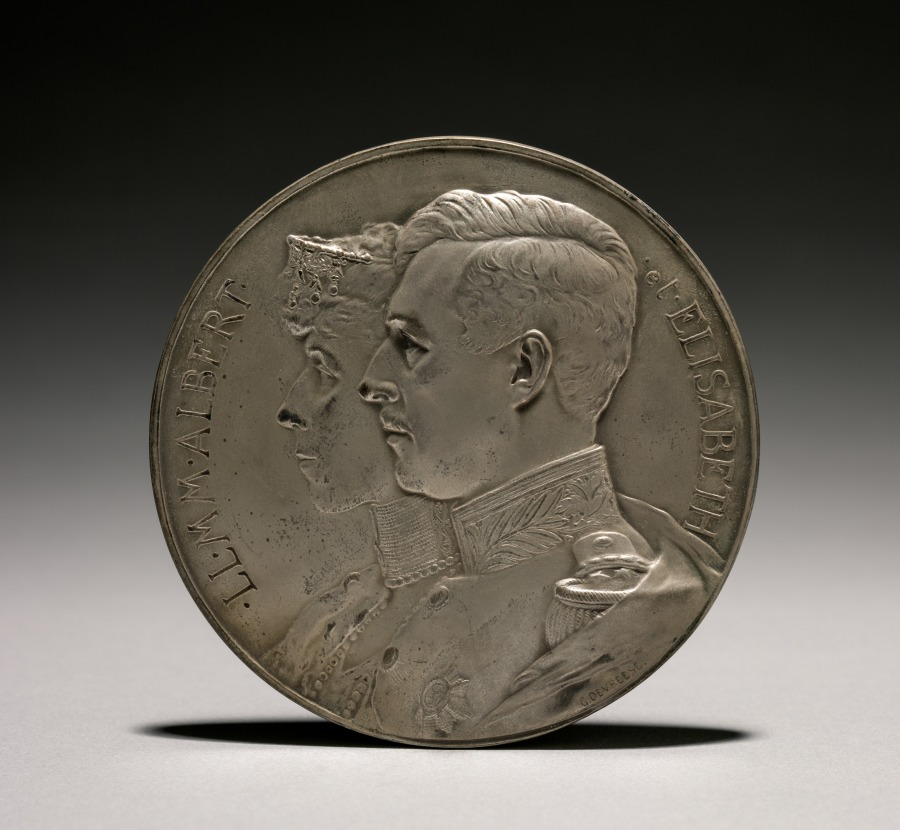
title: Medal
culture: Belgium, early 20th century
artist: Godefroid Devreese (Belgian, 1861–1941)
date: 1914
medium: bronze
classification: Metalwork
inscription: obverse - "LL.MM.ALBERT et ELISABETH"; signed: "G. Debreese." reverse - "Generosite -- Amerique. Belgique -- Gratitude"; signed: "1914 G. Devreese."